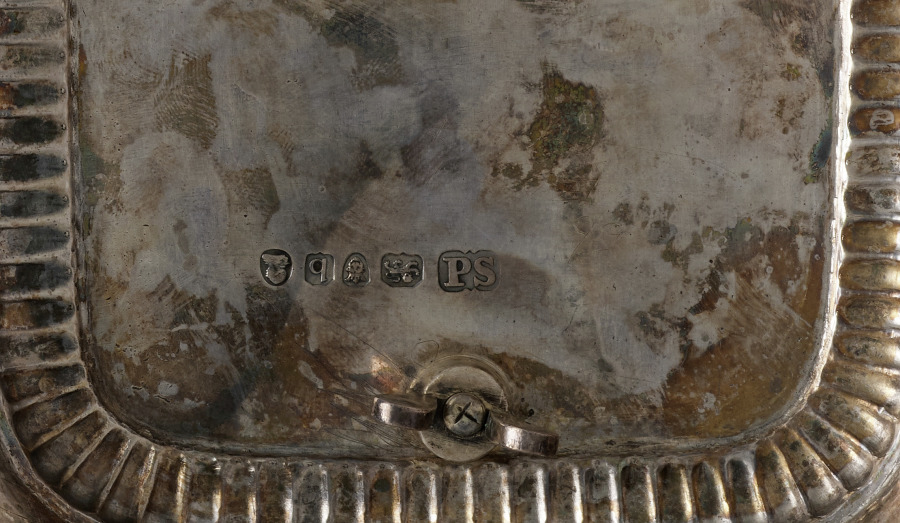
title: Cruet Stand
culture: England, London, 19th century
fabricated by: Paul Storr (British, 1771–1844)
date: 1817–1818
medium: silver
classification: Silver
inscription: Scratched underside: "56\ Eoxx\ moxx", "6087", "SRH-".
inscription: "2" engraved on base leg of vessel holder and by pin on underside of base.